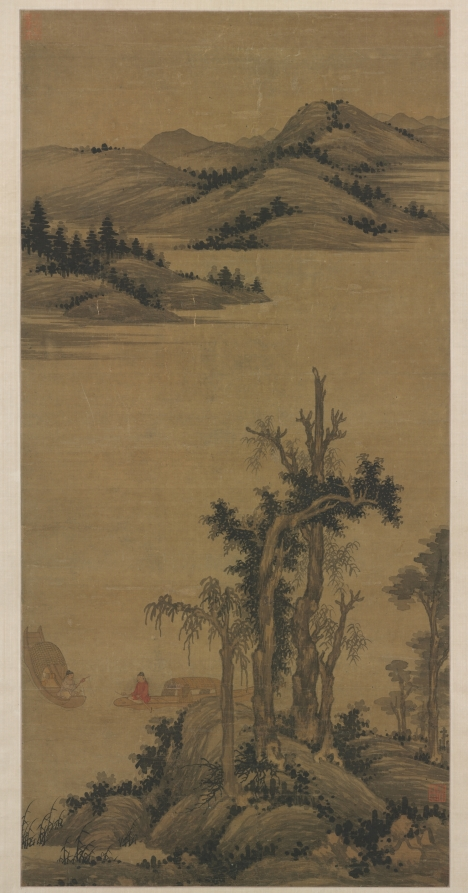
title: Fishermen-Hermits in Stream and Mountain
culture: China, Yuan dynasty (1271-1368)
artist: Zhao Yong (Chinese, c. 1289-c. 1362)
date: 1300s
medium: Hanging scroll; ink and color on silk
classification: Painting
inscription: 仲穆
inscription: [印] 吳興張氏圖書之記; [印] 心賞; [印] 張珩私印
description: In this typical southern two shores divided by a river composition, two fishermen, each seated in the stern of his covered houseboat, troll their hooks in the swirling water, holding short rods fitted with spooling reels. Zhao Yong was a son of the southern calligrapher and statesman Zhao Mengfu, who, like his father was a scholar-official in the Mongol-Yuan government. As public servants of the Yuan state and administration, scholar-artists like the Zhaos delighted in paintings that pictured them in nature as fishermen amid vistas of Jiangnan, which they considered their home.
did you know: The composition of two shores divided by a river was mostly famously associated with the Yuan painter Ni Zan.